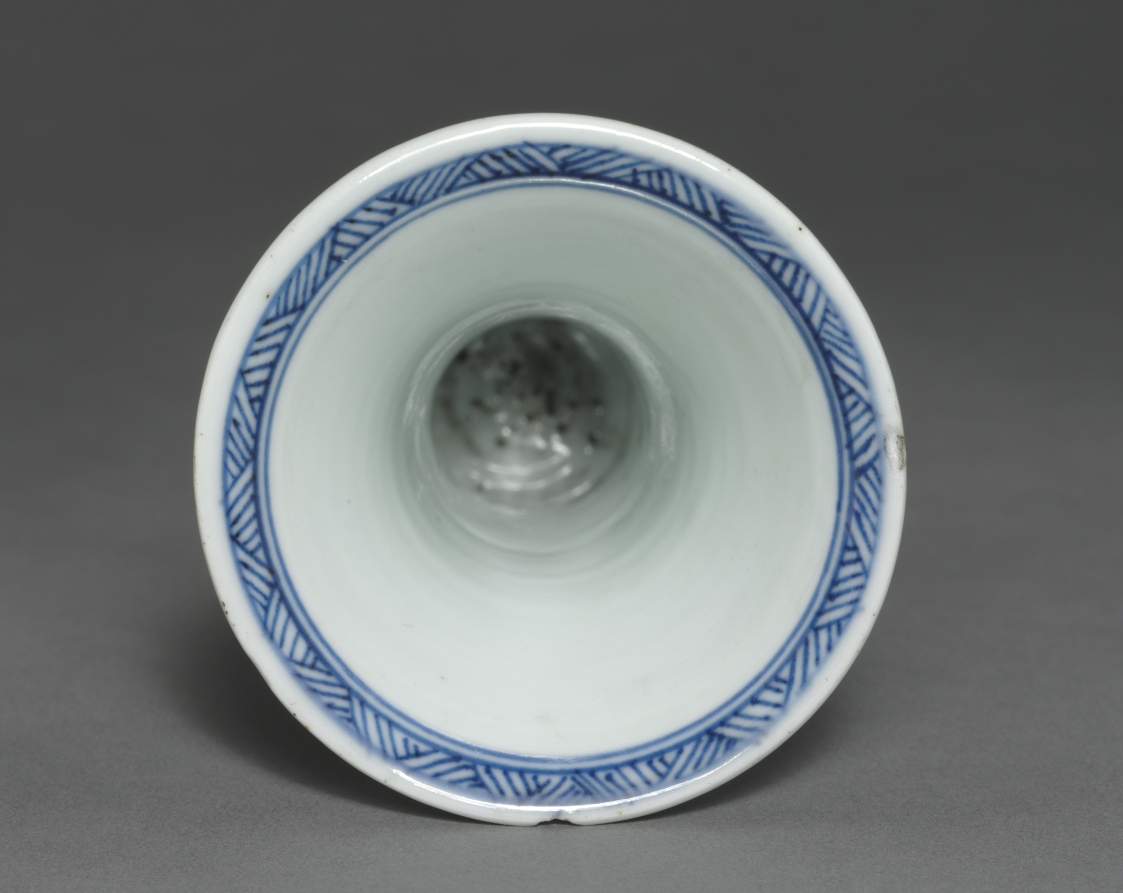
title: Beaker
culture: China, Qing dynasty (1644-1911), Daoguang reign (1821-1850) - Xianfeng reign (1851-1861)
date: 19th Century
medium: porcelain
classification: Ceramic